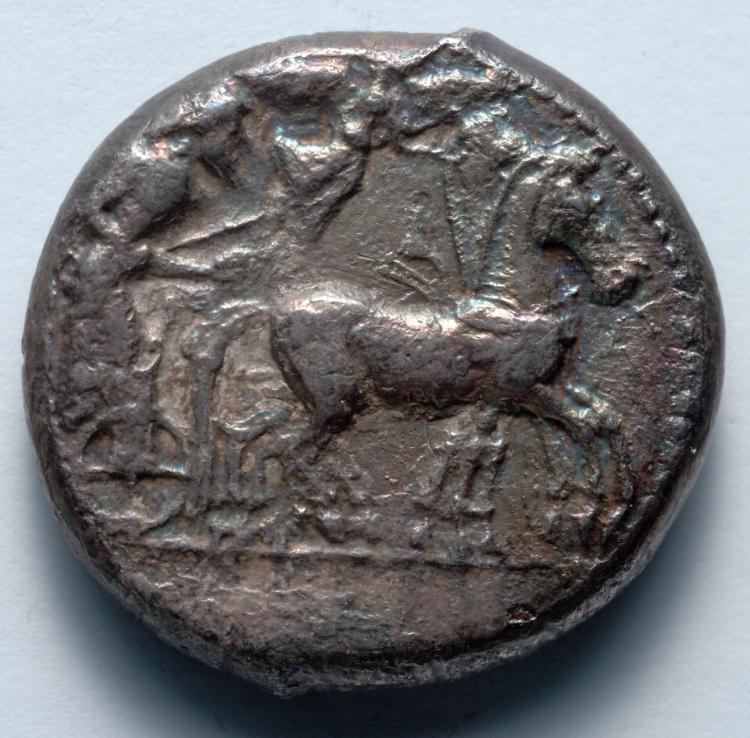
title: Tetradrachm: Quadriga, Nike (obverse)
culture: Greek, minted at Syracuse (Sicily)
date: 485–478 BCE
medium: silver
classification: Coins